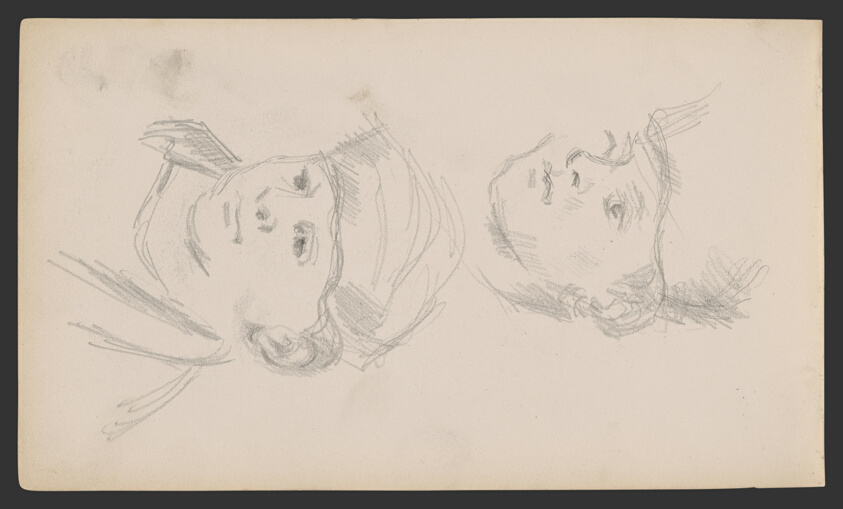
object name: Drawing and Watercolor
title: Sketchbook No. 2 (L'Estaque)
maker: Paul Cézanne; French, 1839-1906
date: 1875–86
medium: Graphite and pen and ink drawings on paper, bound into a book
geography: France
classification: sketchbook; graphite; prints and drawing; paper